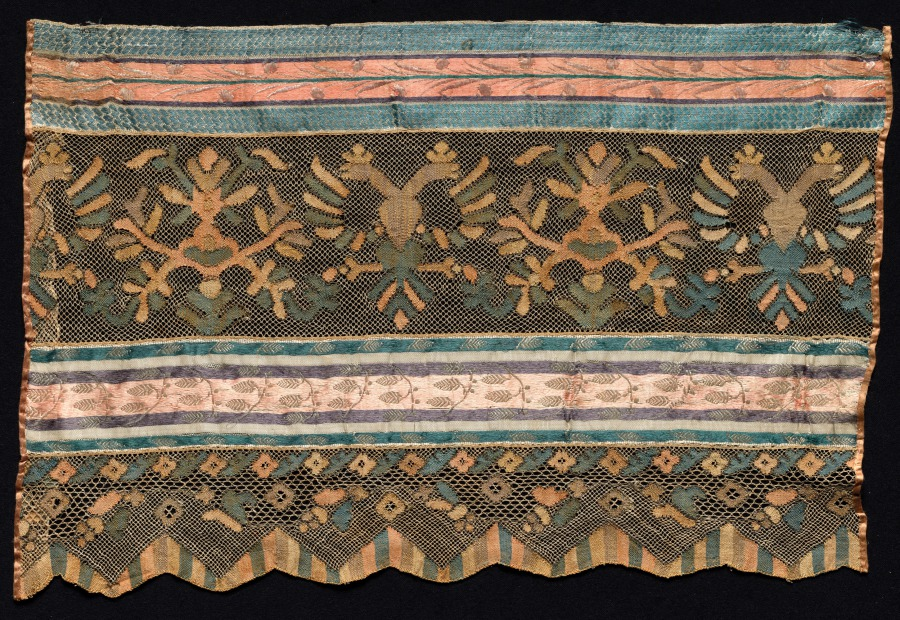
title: Lace Towel End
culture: Russia, Tver province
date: 1700s–1800s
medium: cotton or linen (est.) straight (continuous) bobbin lace; ground with interspersed motifs of plant and animal forms in plain weave outlined with metal thread; applied silk (est.) ribbons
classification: Lace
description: This Russian lace panel was likely used to embellish the end of a bathing towel. Textiles of this type are valuable for their fine lace making including ancient folk motifs, ritual significance, exemplification of the role of textiles in their society, and in this case, connection to a prominent woman collector, Natalia de Shabelsky, without whom this textile and others like it might have been lost.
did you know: Embellishing the ends of everyday towels was a common folk tradition in many cultures because it displayed the skill of the mother or daughter who made this lace.